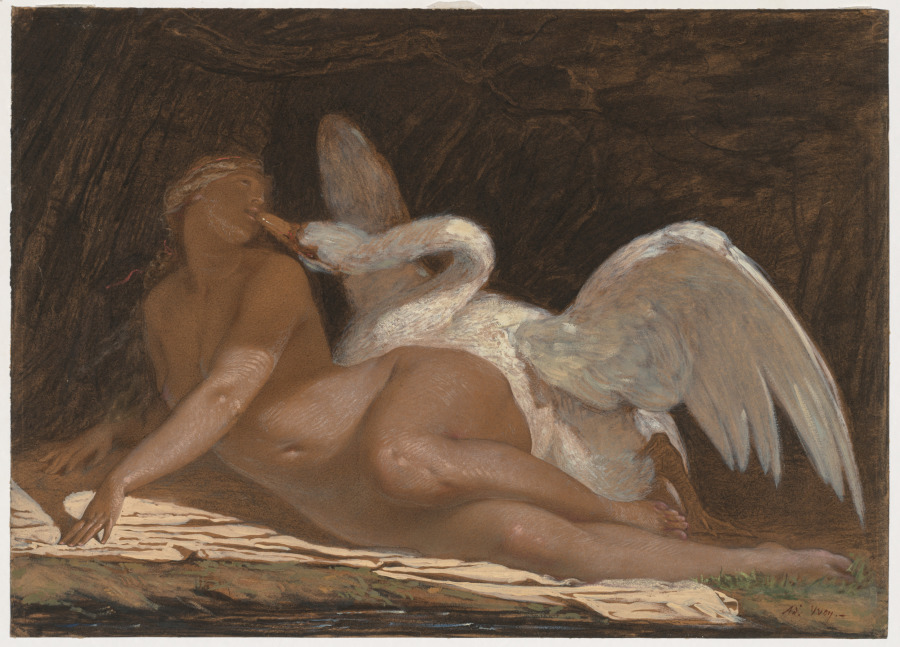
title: Leda and the Swan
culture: France, 19th century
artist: Adolphe Yvon (French, 1817–1893)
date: c. 1846–83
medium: Charcoal and gouache with touches of pastel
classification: Drawing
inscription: lower right, in brown gouache: Ad. Yvon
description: In the late 1520s Michelangelo made a painting depicting Leda and the swan, a mythological story in which Zeus assumes the form of a swan to seduce the mortal woman Leda, producing two children with her. Michelangelo’s version was undeniably more erotic and sensuous than most previous treatments of the subject, as well as more famous. Although the original was lost, several copies of the composition were made from a cartoon (full-scale drawing) that was taken to France by one of Michelangelo’s pupils in the 1530s. This drawing by Adolphe Yvon suggests that Michelangelo’s distinctive sensual rendering of the subject persisted into the 1800s.